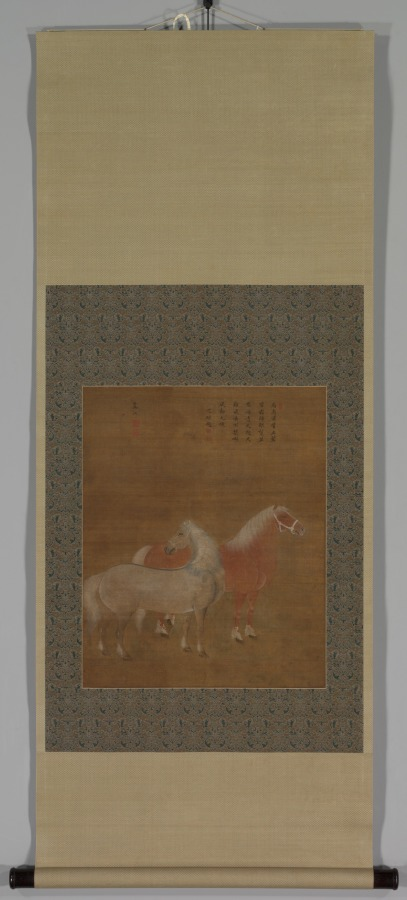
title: Two Horses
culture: China, Qing dynasty (1644-1911)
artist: attributed to Yu Yuan (Chinese, active 1700s)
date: 1644–1911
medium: Hanging scroll; ink and color on silk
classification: Painting